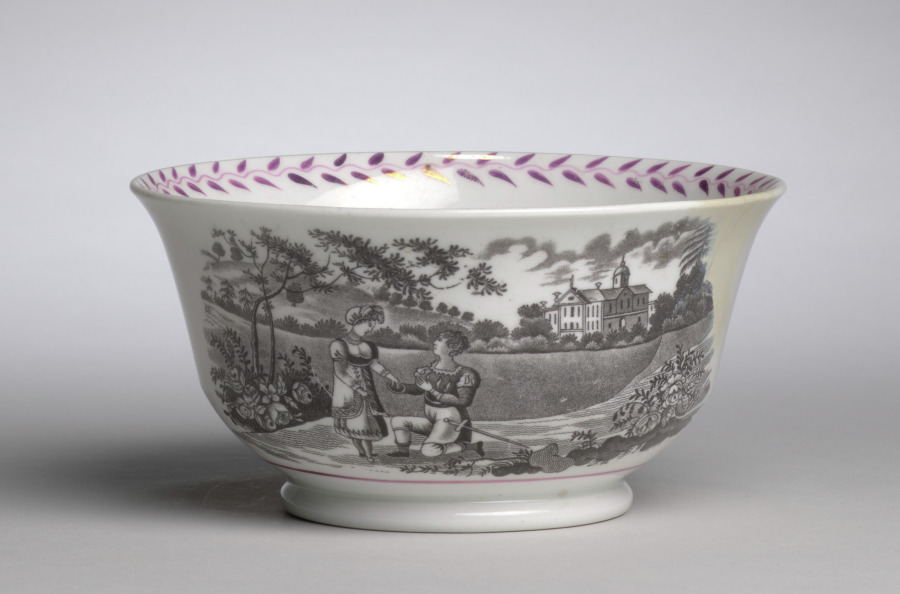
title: Waste Bowl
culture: England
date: c. 1800–1825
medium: earthenware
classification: Ceramic